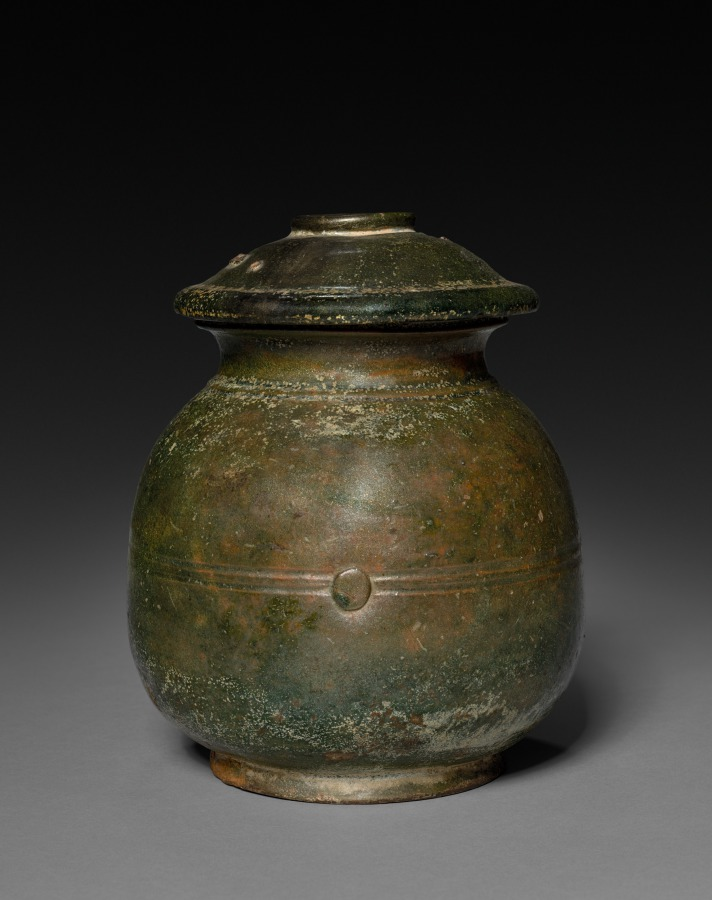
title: Jar with Cover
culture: China, Han dynasty (202 BCE–220 CE)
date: 206 BCE–220 CE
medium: glazed earthenware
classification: Ceramic